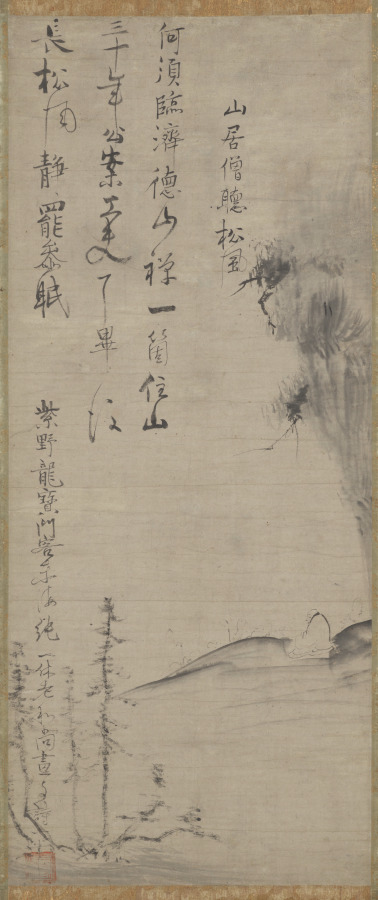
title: Listening to the Wind in the Pines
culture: Japan, Muromachi period (1392–1573)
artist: Ikkyū Sōjun (Japanese, 1394–1481)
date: 1400s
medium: hanging scroll; ink on paper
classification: Painting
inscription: 山居僧聴松風/何須臨済徳山禅一箇住山/三十年公案工夫了畢後/長松風静罷参眠 (transcribed by Trevor Menders with Zheng Xiaoying 2017, revised by Osvaldo Mercuri 2021)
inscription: 紫野龍寶門客东海純一休老和尚畫と詩一筆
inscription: 落款 一休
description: A monk sits in contemplation below an overhang covered with pine. The poem, titled "Monk in the Mountains Listening to the Wind in the Pines," refers to two Chinese Chan (Zen) Buddhist monks active in the ninth century. It may be translated as follows: Why must the Zen of Rinzai (Linji Yixuan) and Tokusan (Deshan Xuanjian) reside in a single temple for thirty years? Once he's solved his kōan, (the monk) ends his practice and falls asleep in the quietness of the wind among the tall pines. (translated by Osvaldo Mercuri) According to an inscription following the poem, both painting and verse were done by an eminent Japanese Buddhist monk known for revitalizing the Kyoto temple Daitokuji.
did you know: The word mountain, appearing in the title to the poem on this painting, can also refer to a temple.